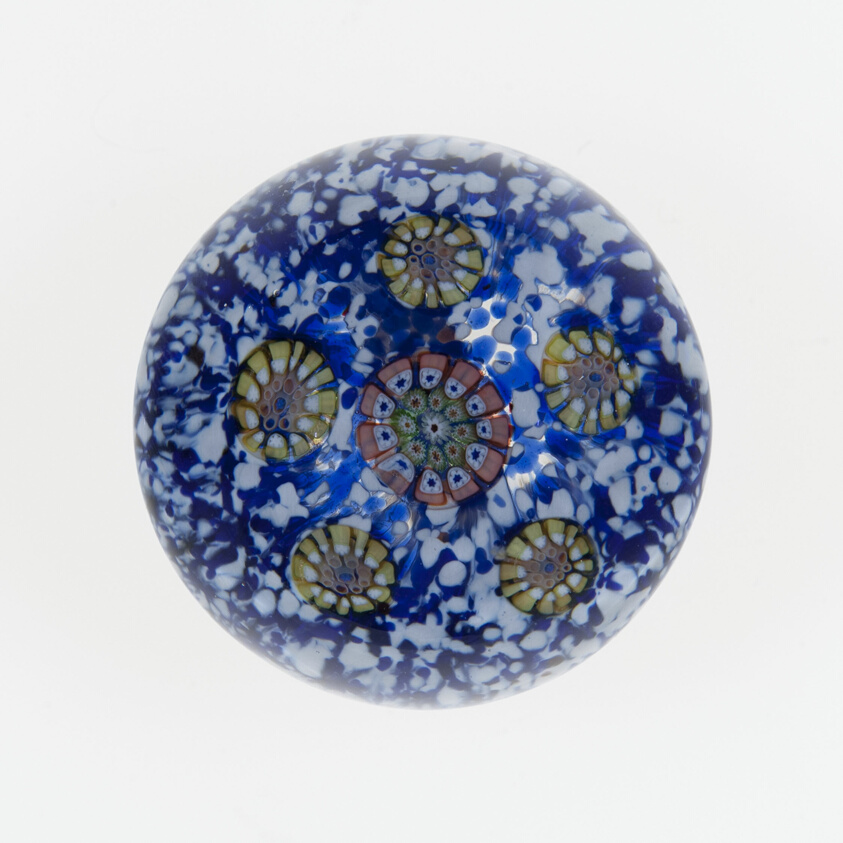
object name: Glass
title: Paperweight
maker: Saint-Louis Glassworks (Cristalleries de Saint-Louis); Lorraine, France, founded 1586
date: c. 1848–55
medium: Glass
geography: Saint-Louis-lès-Bitche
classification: paperweight; millefiori; european decorative arts; glass